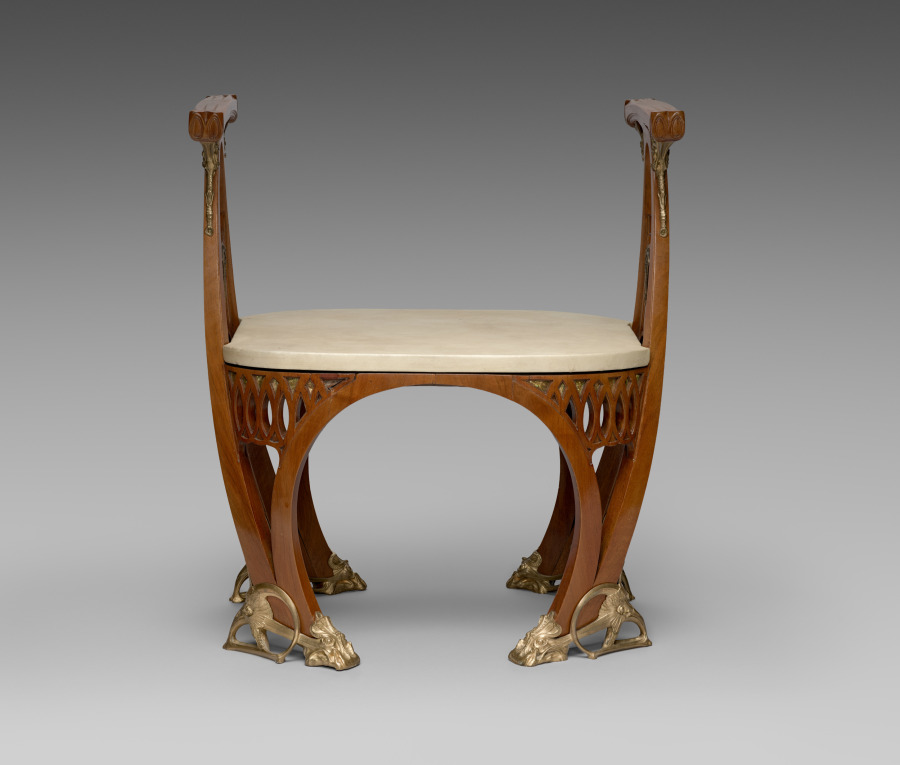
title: Tabouret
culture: France, Paris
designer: Carlo Bugatti (Italian, 1856–1940)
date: c. 1907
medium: Mahogany, parchment, gilt bronze, mother-of-pearl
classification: Furniture and woodwork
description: Although this tabouret is undocumented, its design, with its interlaced ovoid forms, gilt cast metal mounts, and mother-of-pearl inlays, is so close in style to the Cleveland Museum of Art’s celebrated tea table (1991.45) that it too can be assigned to Bugatti's Parisian period and dated about 1907.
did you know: Carlo Bugatti's son Ettore founded the luxurious car company Bugatti Automobiles.